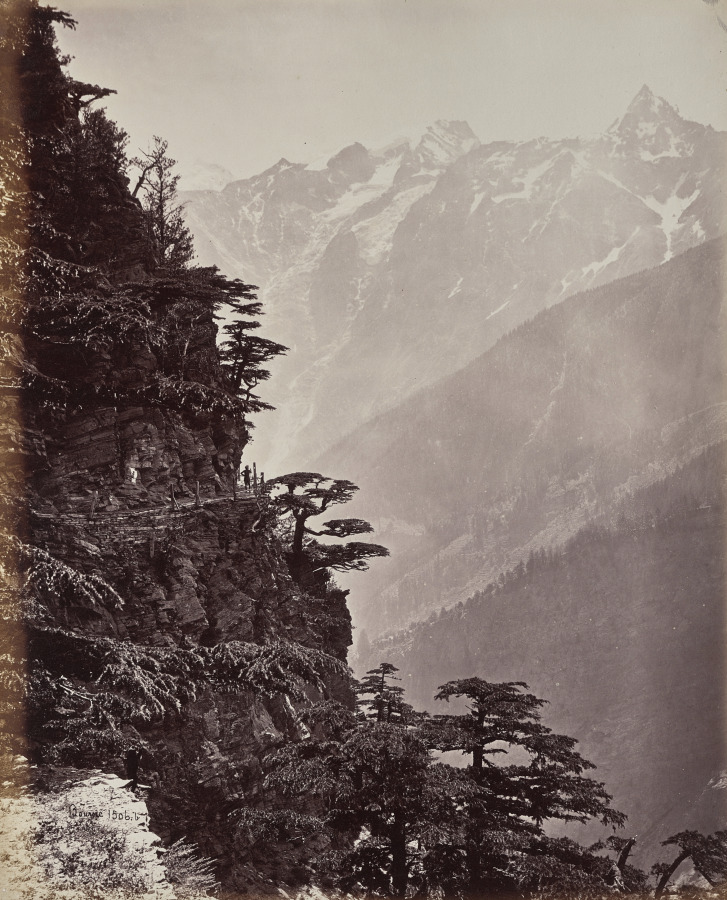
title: The Upper Himmalayahs. View on the New Road Near Rogi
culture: England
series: Photographs of Northern India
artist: Samuel Bourne (British, 1834–1912)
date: 1863–70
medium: albumen print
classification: Photograph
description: The 50 images in this album, all taken in the 1860s, move from the hill towns of the Himalayas down to cities including Lahore (now in Pakistan), Delhi, Lucknow, Agra, Benares (now Varansi), and Calcutta (now Kolkata). Architectural studies of major monuments offer valuable historical records of what sites such as the Taj Mahal and the imperial mosque of the Mughal emperors in Delhi looked like before 20th-century restorations.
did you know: Samuel Bourne, the author of most the images in this album, was a banker in England before he moved to India to become a professional photographer.